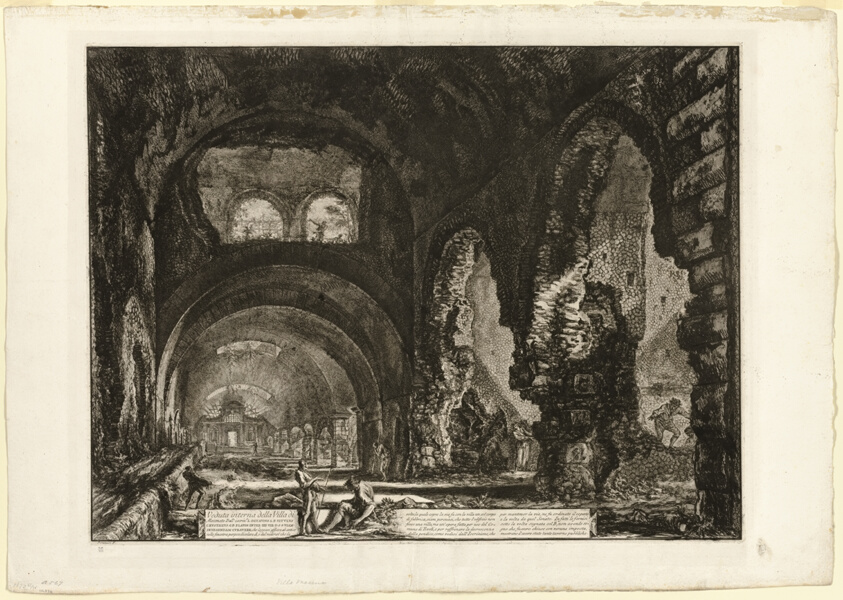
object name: Print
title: Interior view of the villa of Maecenas, from Views of Rome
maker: Giovanni Battista Piranesi (Italian, 1720-1778); published by Francesco (Italian, 1758-1810) and Pietro Piranesi (Italian, born 1758/9)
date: 1764, published 1800–07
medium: Etching on heavy ivory laid paper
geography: Italy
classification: etching; print; prints and drawing